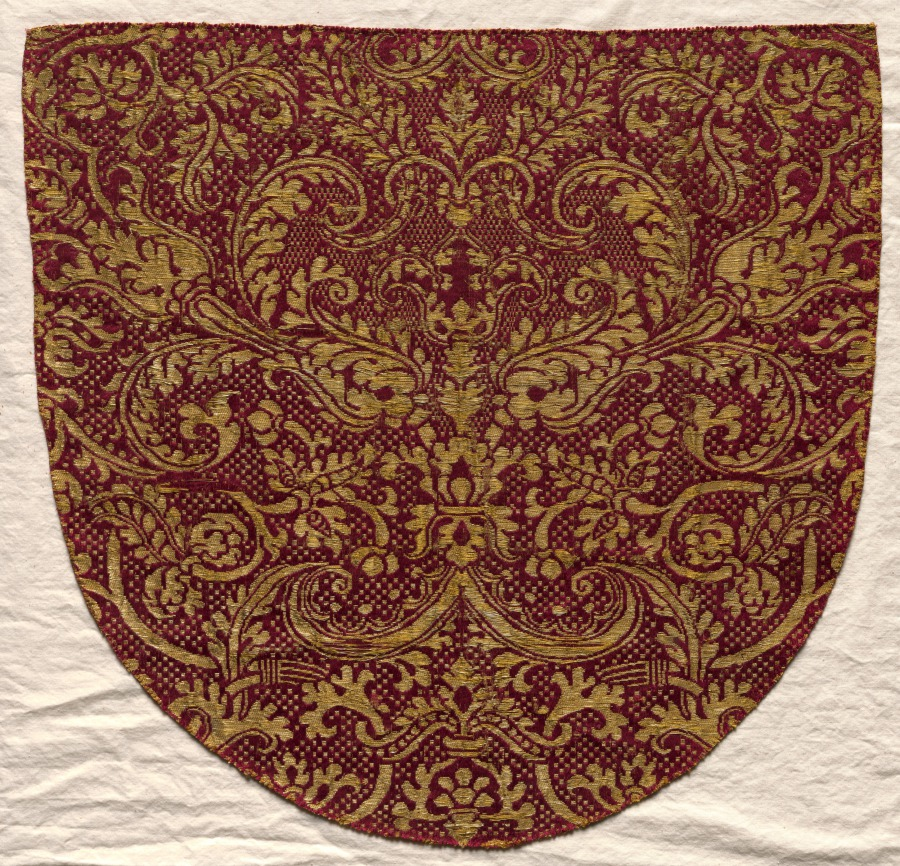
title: Hood from a Cope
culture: Italy, 16th century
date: 1500s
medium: brocade; silk and metal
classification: Textile